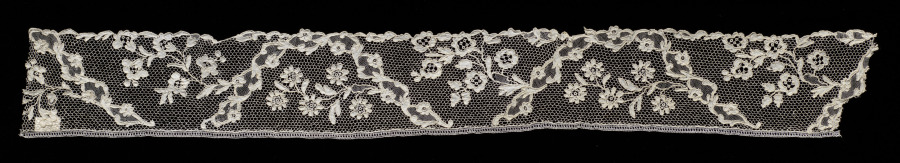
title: Lace Edging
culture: France, Argentan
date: 1715–74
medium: Linen: needle lace (Point de Argentan)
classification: Lace